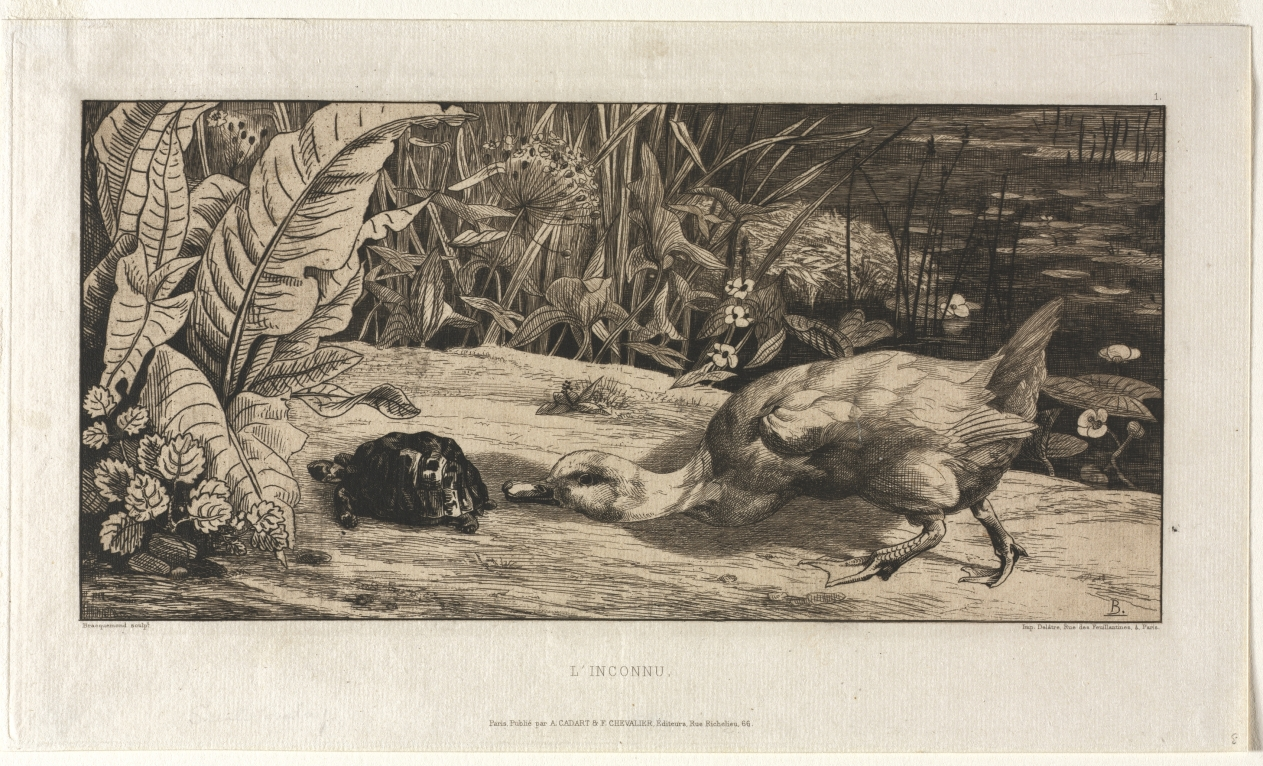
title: The Unknown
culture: France, 19th century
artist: Félix Bracquemond (French, 1833–1914)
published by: A. Cadart & F. Chevalier, rue Richelieu, 66, Paris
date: 1862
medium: etching and drypoint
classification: Print